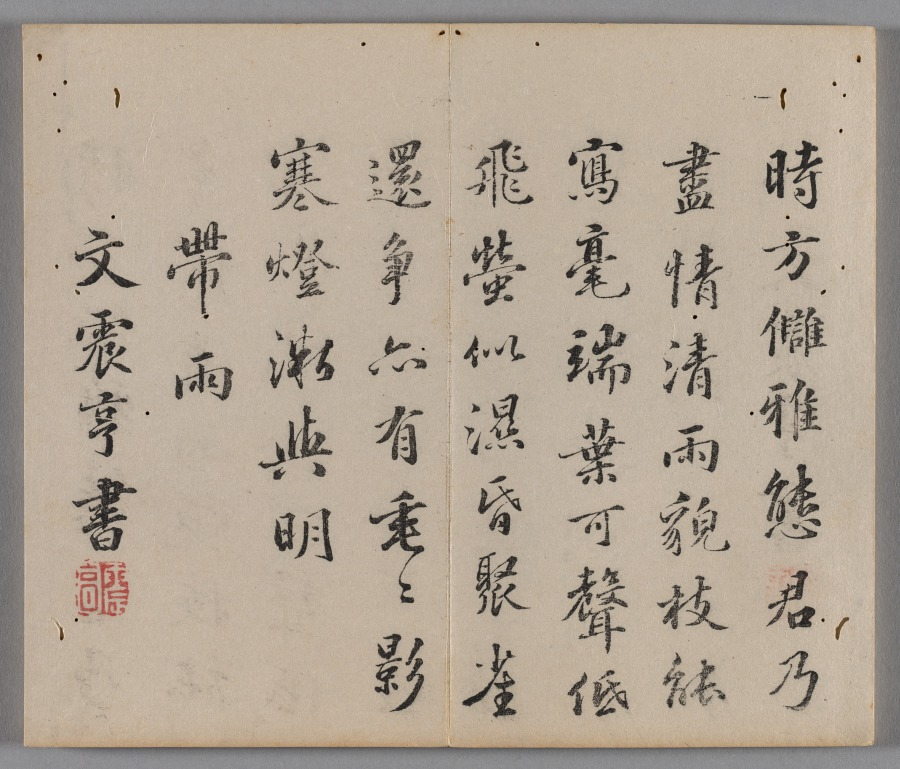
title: Ten Bamboo Studio Painting and Calligraphy Handbook (Shizhuzhai shuhua pu): Bamboo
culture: China, Qing dynasty (1644-1911)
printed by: Hu Zhengyan (Chinese, c. 1584–1674)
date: 1633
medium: Woodblock-printed book; ink and colors on paper; first edition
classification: Print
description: Color printing reached a level of perfection in the early 1600s, as seen in this Ten Bamboo Studio Collection of Calligraphy and Painting and the Mustard Seed Garden Manual of Painting (printed 1679 and 1701). The painterly quality, precision in registering (aligning) the woodblocks, and harmonious colors made them the most successful color print editions in Chinese history. Both editions were printed and compiled in Nanjing, spread nationwide, and had a great impact on the arts in Japan and Korea.